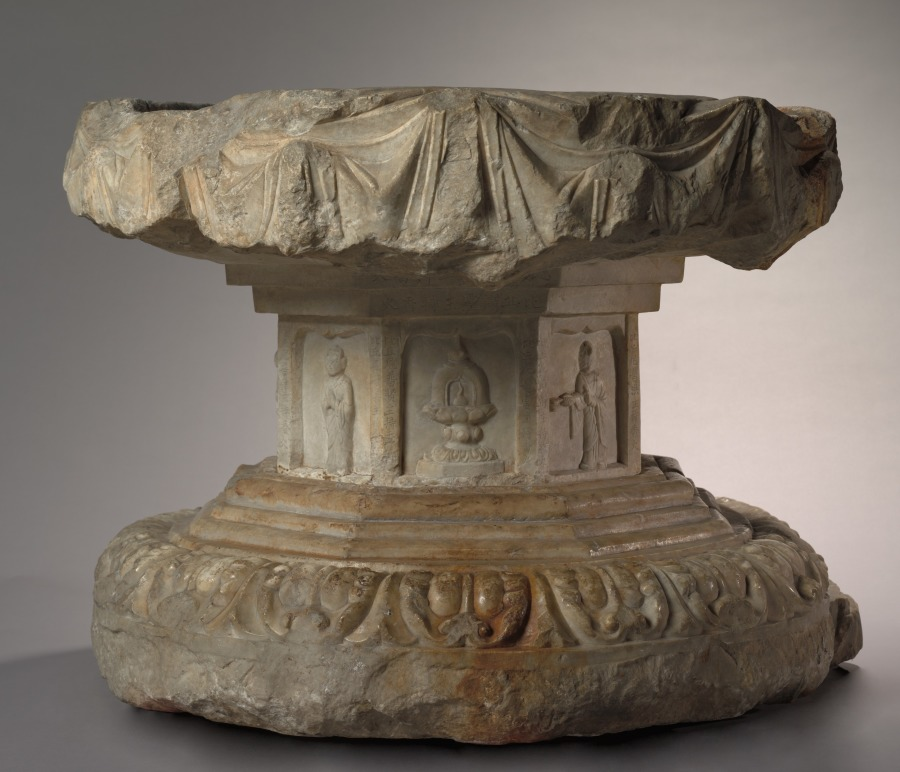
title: Fang Xuanling Pedestal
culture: China, Tang dynasty (618-907)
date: 647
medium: marble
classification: Sculpture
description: This double lotus pedestal exhibits the rich, ornate style of early Tang sculpture. It was commissioned by the Duke of Liang, Fang Xuanling (578–648), for the blessing of his second son and daughter-in-law, the Tang imperial princess of Gaoyang. The iconography and inscription suggest that it originally went with a statue, now missing, of Shakyamuni, the historical Buddha, instead of Amitayus. Today the pedestal is topped with Amitayus, the Buddha of Infinite Life, seated in meditation. Although the pedestal was not made with the statue, the combination is faithful to the original artistic conception.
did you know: In front, the top layer of the pedestal has an abstract curvilinear motif suggesting drapery; the rear is carved with a flower-and-leaf motif.